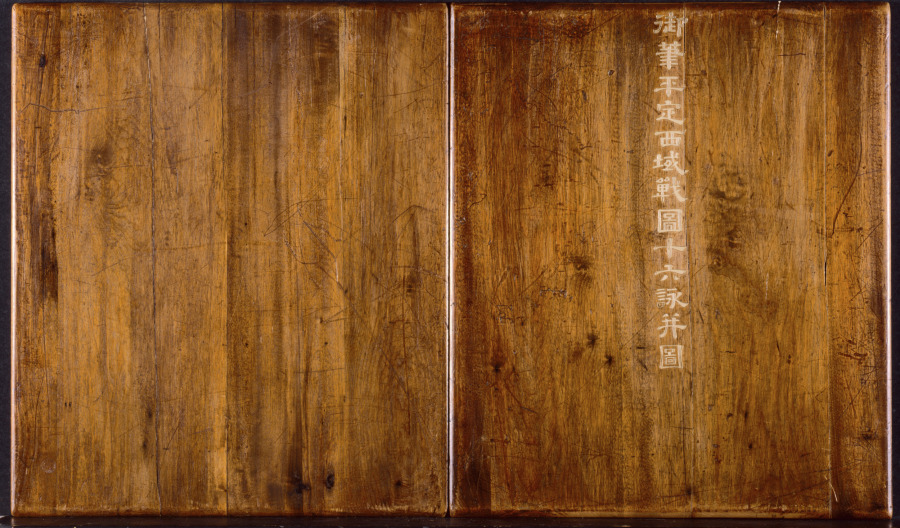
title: Battle Scenes of the Quelling of Rebellions in the Western Regions, with Imperial Poems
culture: China, Qing dynasty (1644–1911), Qianlong reign (1736–95)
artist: Giuseppe Castiglione (Italian, 1688–1766)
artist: Jean Damascene Sallusti (Italian, d. 1781)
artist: Jean Denis Attiret (French, 1702–1768)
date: c. 1765–74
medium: Etchings, mounted in album form, 16 leaves plus two additional leaves of inscriptions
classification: Print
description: This set of etchings was commissioned by Emperor Qianlong to record in pictorial terms the courage of his generals and soldiers in quelling the rebellions in the Western Regions. Qianlong added his own poem to each of the etchings, indicating his appreciation and pride in this demonstration of military might. "Western Regions" refers to the present-day Xingjiang province, often described in Western writing as "Central Asia."